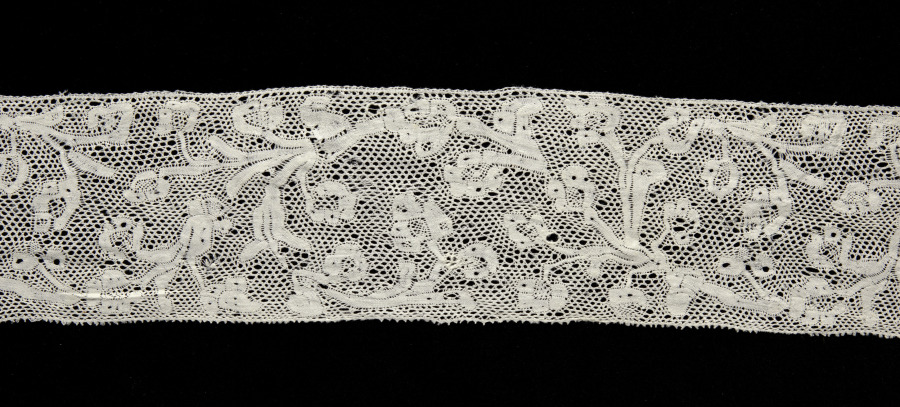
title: Lace Edging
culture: Italy, Abruzzi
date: 1700s–1800s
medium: Bobbin lace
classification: Lace